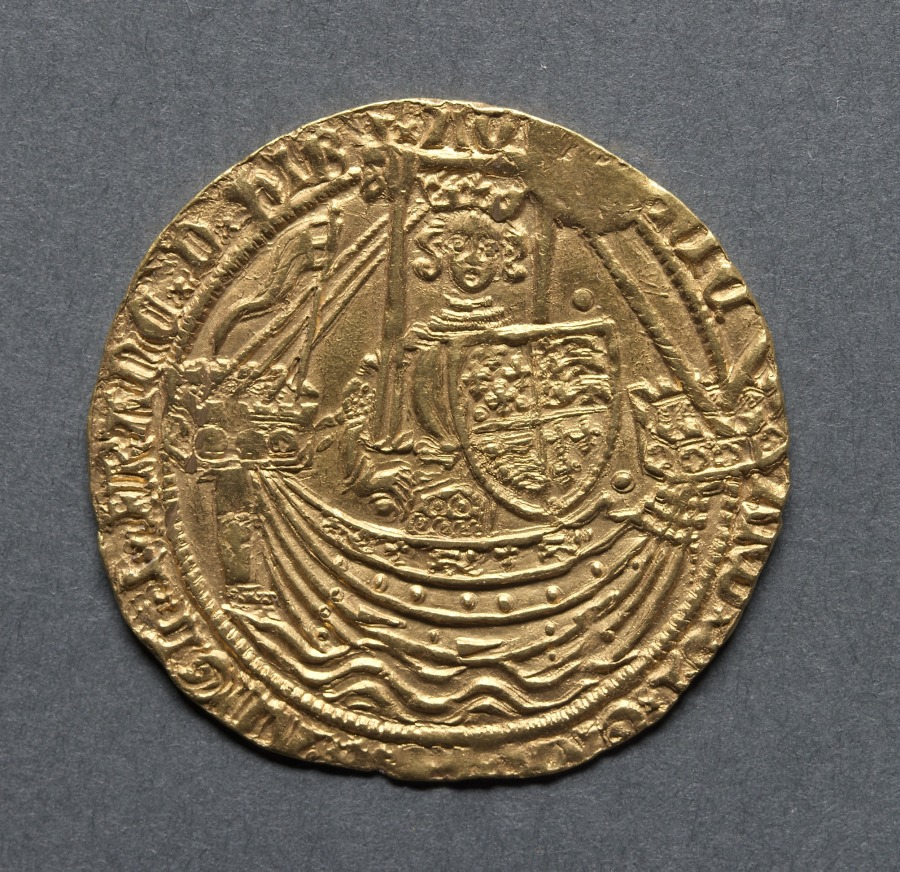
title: Noble: Richard II Standing on Ship with Shield of Arms (obverse); Ornamental Cross with Lis Terminals (reverse)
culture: England, Richard II, 1377-1399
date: 1377–1399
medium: gold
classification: Coins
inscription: RICARD DI GRA REX ANGLE Z FRANC D HIB Z AQ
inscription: IHC. AVTEM TRANSIENS PER MEDIV. ILLORVM IBAT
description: This type of coin is very similar to that of the last right but a flag or pennant has appeared on the stern-castle of the ship. This signifies that the piece was struck in the Calais mint, then, and for 180 years to come, an English possession. There are three other points of interest in the Nobles of this period. First some of the early pieces of the reign were struck from the dies of the previous king, Edward III. Secondly, a symbol, such as a lion, trefoil or crescent was sometimes placed on the ship's rudder. Fours such marks were used, their purpose being to distinguish different issues. Finally, four styles of lettering were used.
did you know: Richard II was king of England from 1377 until 1399 and was the subject of a play by William Shakespeare.